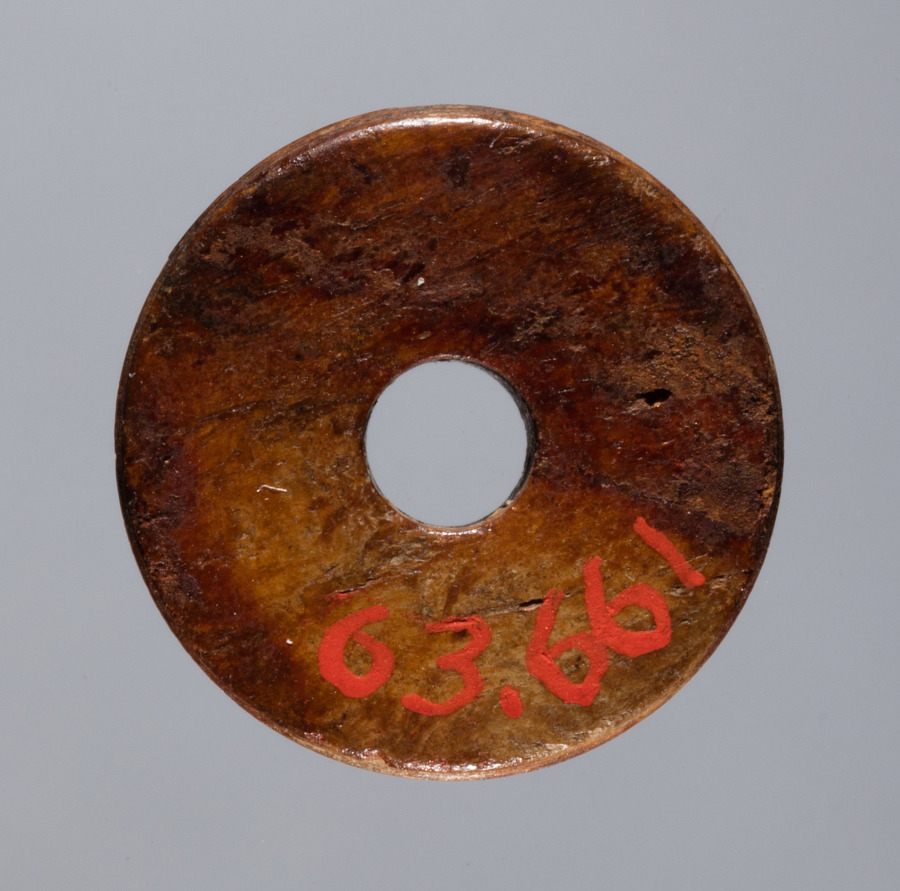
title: Spindle Whorl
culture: Iran, early Islamic period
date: 700s - 900s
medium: bone, incised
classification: Spindle Whorl